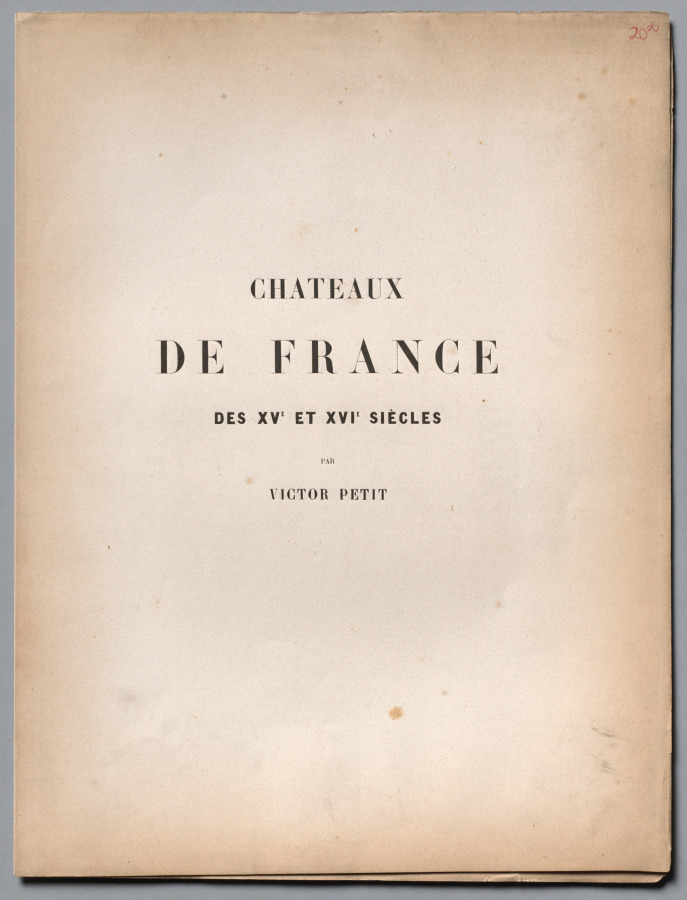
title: Architecture Pittoresque ou Monuments des xveme. Et xvieme. Siecles: Chateaux De France des XV et XVI Siecles: Title Page and Table of Contents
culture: France, 19th century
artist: Victor Petit (French, 1817–1874)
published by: Charles Boivin (publisher and editor); Lith de Godard a Paris (printer)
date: published 1860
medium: lithograph with tint stone, from portfolio of 100 lithographs with tint stone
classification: Portfolio